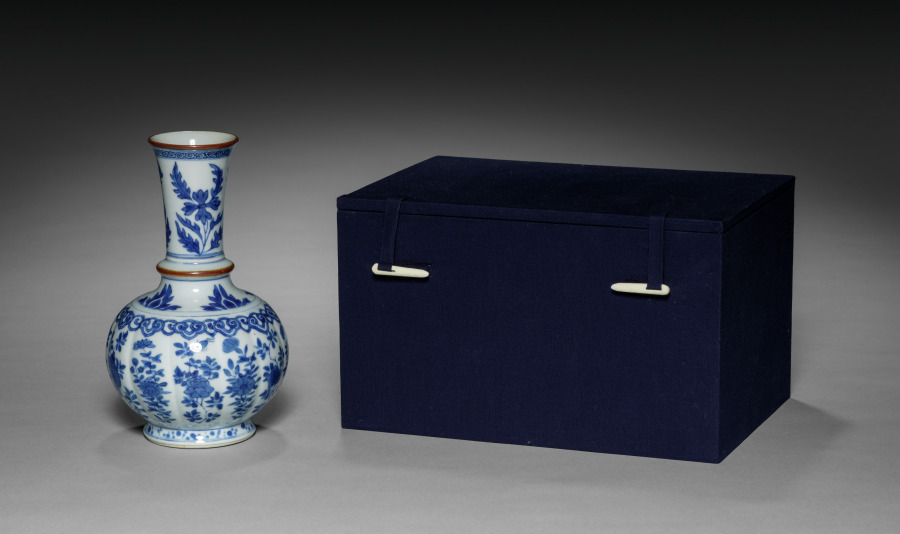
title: Lobed vase with underglaze cobalt blue decoration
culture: China, Jiangxi province, Jingdezhen kilns, Qing dynasty (1644-1911), Kangxi reign (1661-1722)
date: 1661–1722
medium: Porcelain with underglaze cobalt blue decoration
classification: Ceramic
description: Underglaze blue-and-white designs reached their highest painterly quality during the reign of the Kangxi emperor (1662–1722). Porcelain decorators achieved a level of artistic and technical sophistication that rivaled that of professional painters. Blue-and-white porcelains in brilliant cobalt blue catered to the taste of the educated class, the court, and foreign markets. Notice the blue-and-white porcelains in Pierre Bonnard’s painting Fruit and Fruit Dishes (CMA 2020.100); such ceramics on a French dining table would have been inspired by Chinese porcelains of this type.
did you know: The underside shows the mark of a feather, done in blue underglaze.